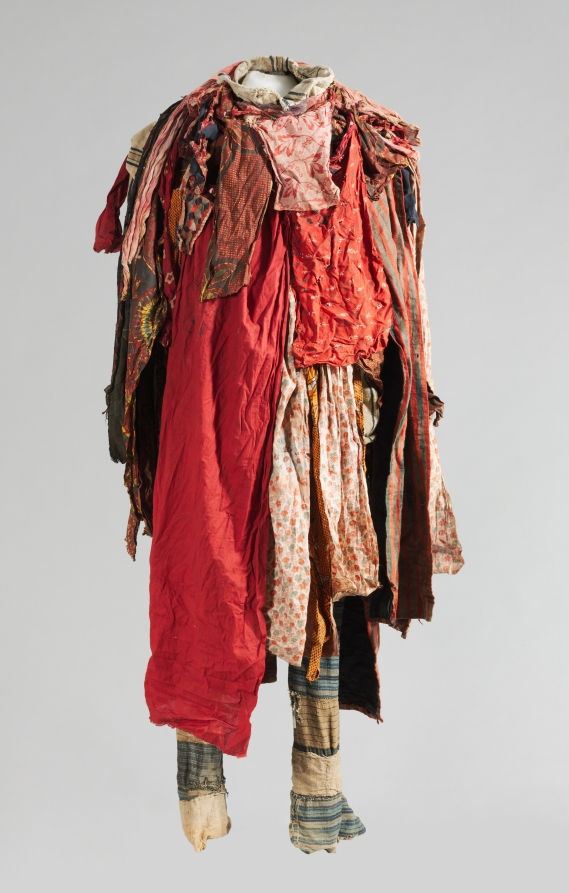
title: Egúngún Masquerade Dance Costume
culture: Africa, West Africa, Nigeria, Yorùbá-style maker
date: 1900s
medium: cotton, velvet, flannel, dye, faux fur, leather, cowrie shells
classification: Mask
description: Swirling into motion, egúngún masquerade costumes appear during annual festivities to bless the community. Manifesting ancestral spirits, they serve as a bridge between the living and the otherworld. The fabric panels create a dwelling place for ancestral spirits. Arranged and selected according to Yorùbá design sense (ojú-ọnà), this mask incorporates hundreds of African, Asian, and European fabrics. These include imported damasks, velvets, faux furs, and embroideries, as well as local indigo-dyed cottons.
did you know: The striped netting on the "face" of this masquerade costume allows the wearer to see out while keeping their identity concealed.